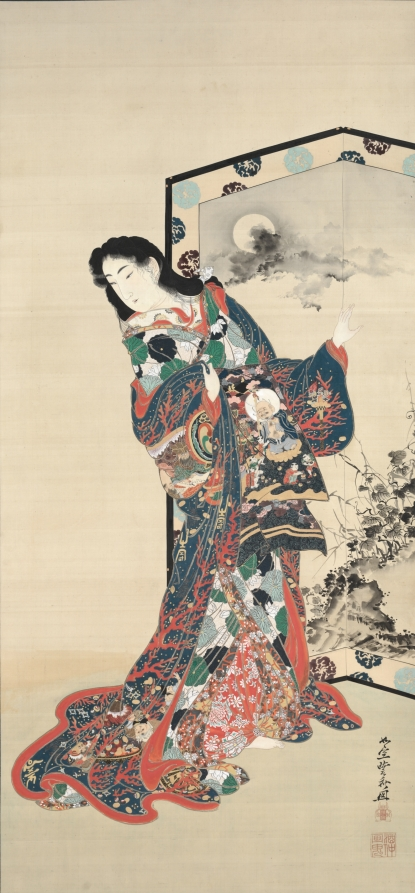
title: Hell Courtesan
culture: Japan, Meiji period (1868–1912)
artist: Kawanabe Kyōsai (Japanese, 1831–1889)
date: 1871–89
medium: Hanging scroll; ink, color, gold, and silver on silk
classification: Painting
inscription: artist's signature and two seals, lower right.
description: Kawanabe Kyōsai repeated this large-scale composition with variations a number of times. In this version, a famous 15th-century courtesan known for wearing a robe with images of the Buddhist hells stands before a folding screen. Legend has it that she was abducted by bandits, and wore the garment to symbolize her belief that her suffering in her current life was punishment for sins committed in a former life. Here, in a parody depiction of the garment, the courtesan stands in for Benzaiten, the goddess of everything that flows, while the remaining members of the Seven Gods of Good Fortune appear on her outer robe. One of them reports sins to Enma, the King of Hell, who is writing out his judgments on the recently deceased.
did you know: The word for longevity appears multiple times in gold and silver on her outer robe.